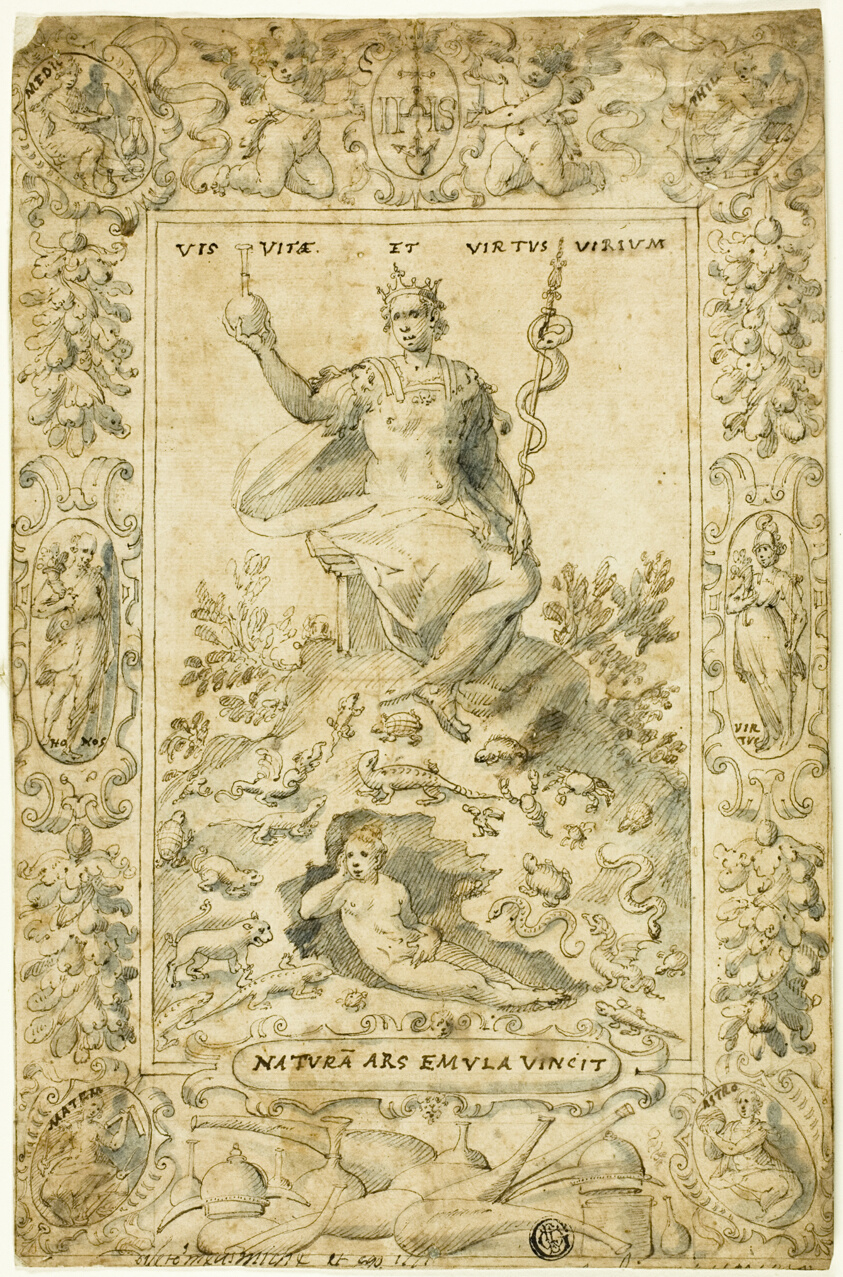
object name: Drawing and Watercolor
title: Design for Emblematic Frontispiece: "Natura Ars Emula Vincit"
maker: Circle of Giovanni Guerra (Italian, 1544-1618)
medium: Pen and brown ink with brush and blue wash, with traces of graphite, on tan laid paper, laid down on card; verso on mount: in pen and black ink (in later hand), elevation of a column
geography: Italy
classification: ink with wash; drawings (visual works); prints and drawing